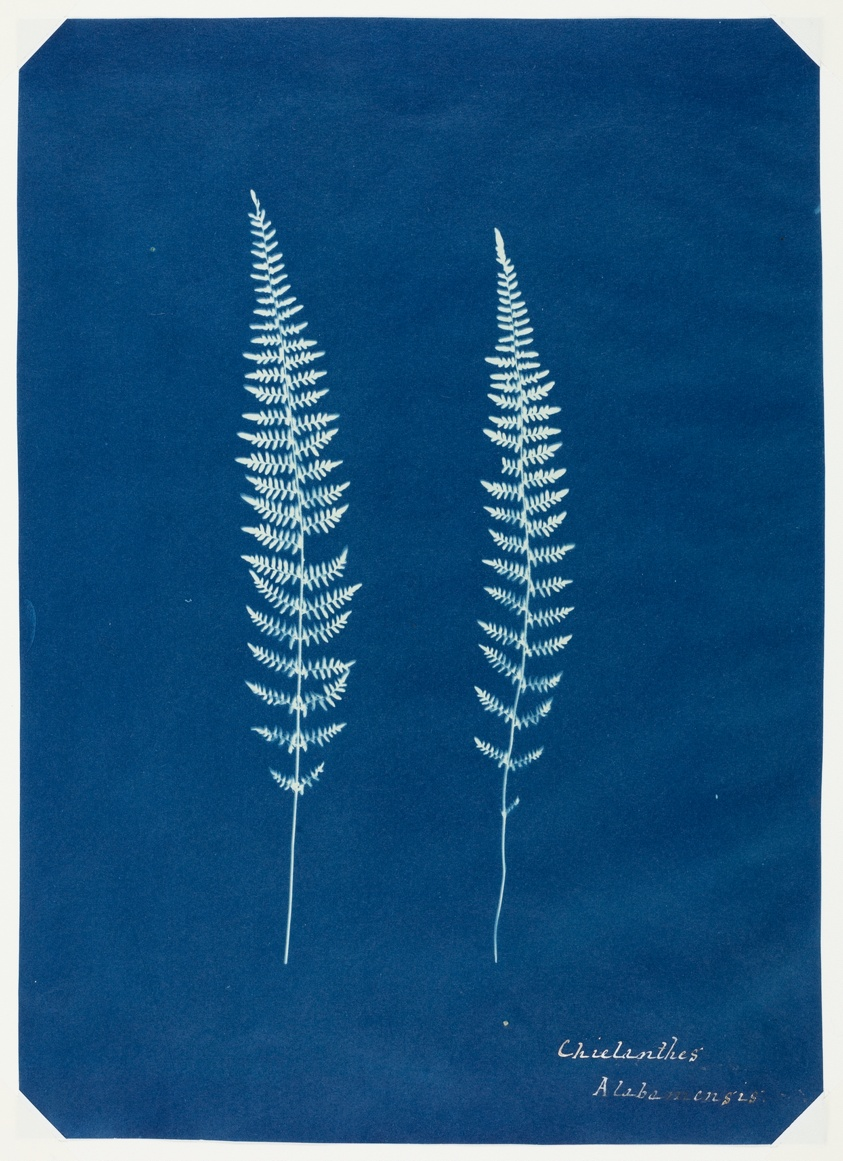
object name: Photograph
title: Untitled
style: 19th century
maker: Artist unknown; English, 19th century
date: c. 1850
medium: Cyanotype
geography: England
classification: cyanotype; photographic process; photography; photograph